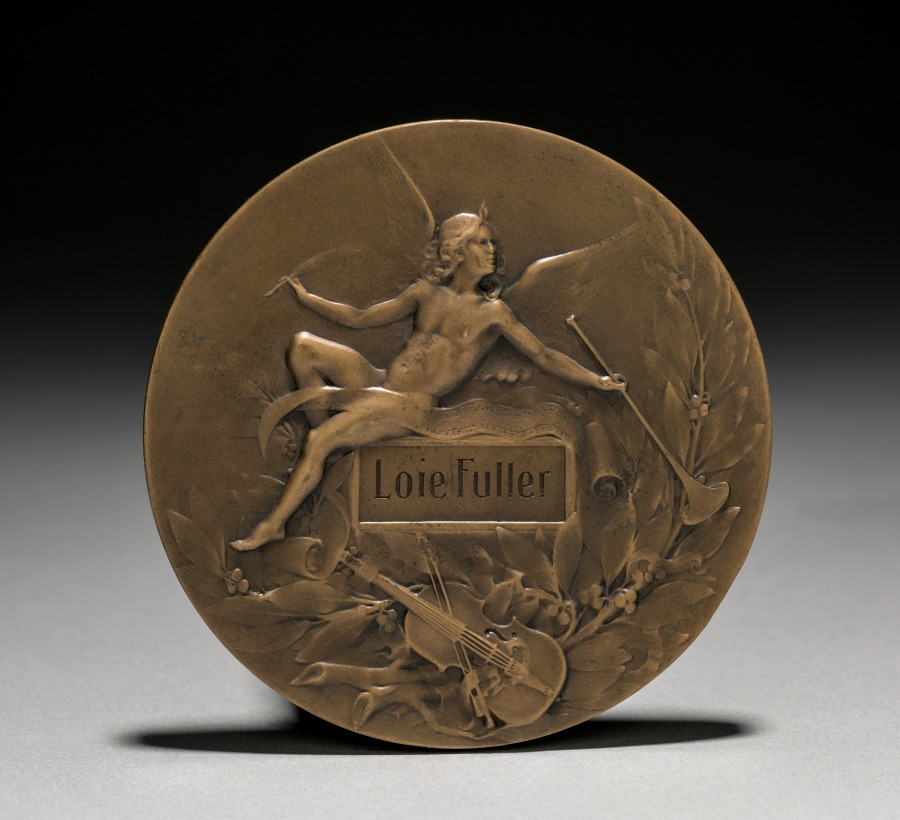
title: Medal Presented to Loïe Fuller by the French Government: Allegory of Music (reverse)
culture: France, 19th century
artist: Marie Alexandre Lucien Coudray (French, 1864–1932)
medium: bronze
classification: Metalwork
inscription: on reverse: Loie Fuller. Inscribed on edge: "Bronze" with an unidentified emblem.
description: A temporary theater on the grounds of the 1900 Exposition Universelle was devoted to Loïe Fuller, who by that time had become a cultural icon. The theater’s interior was hung with draperies onto which a kaleidoscope of colors shone from stained glass windows and hidden lamps, evoking the diaphanous veils of her costumes. In the foyer was a gallery of paintings, drawings, and sculpture all depicting the dancer. Coudray’s medal, Orpheus at the Entrance to the Underworld, was struck to commemorate the world’s fair. This example of the famous Art Nouveau medal was engraved as a gift to Loïe Fuller.